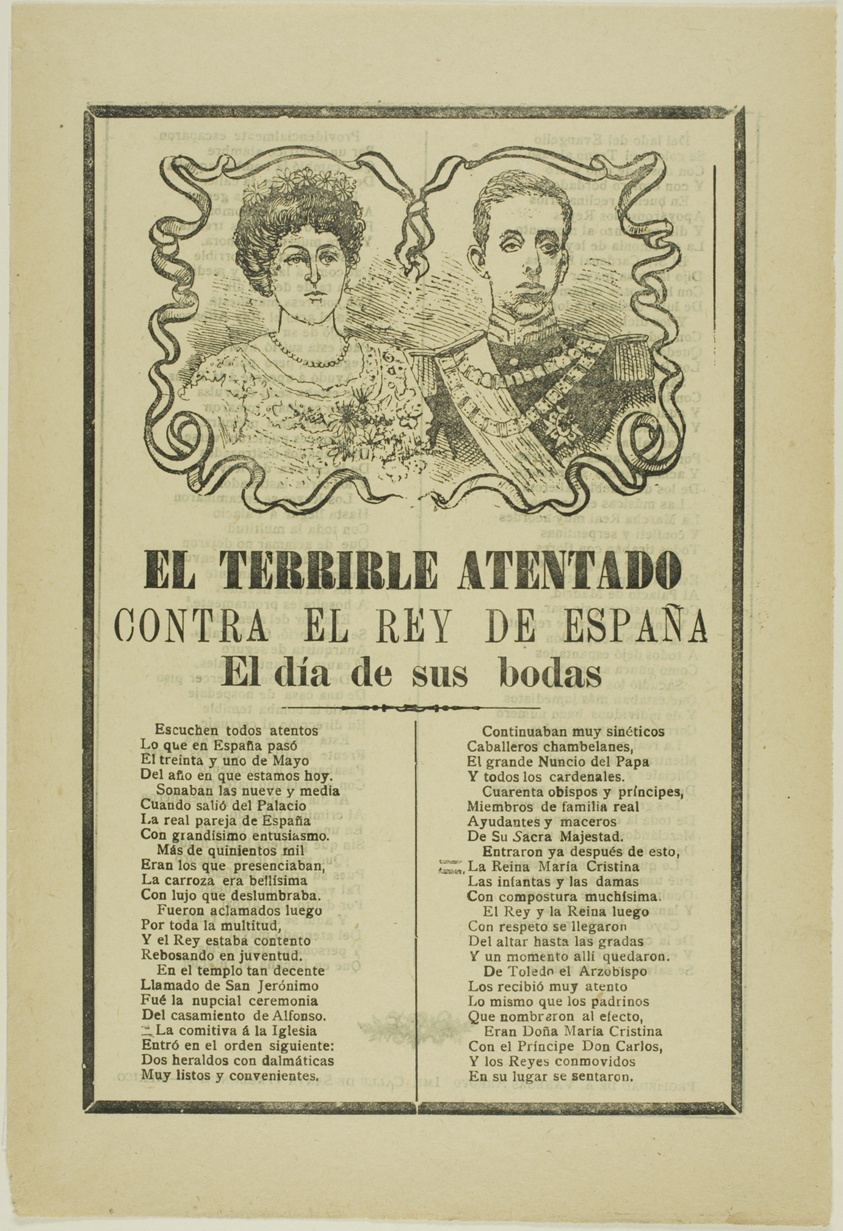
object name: Print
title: The Terrible Attempt Against the King of Spain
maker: José Guadalupe Posada (Mexican, 1852-1913)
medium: Relief etching on paper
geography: Mexico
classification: relief etching; print; prints and drawing